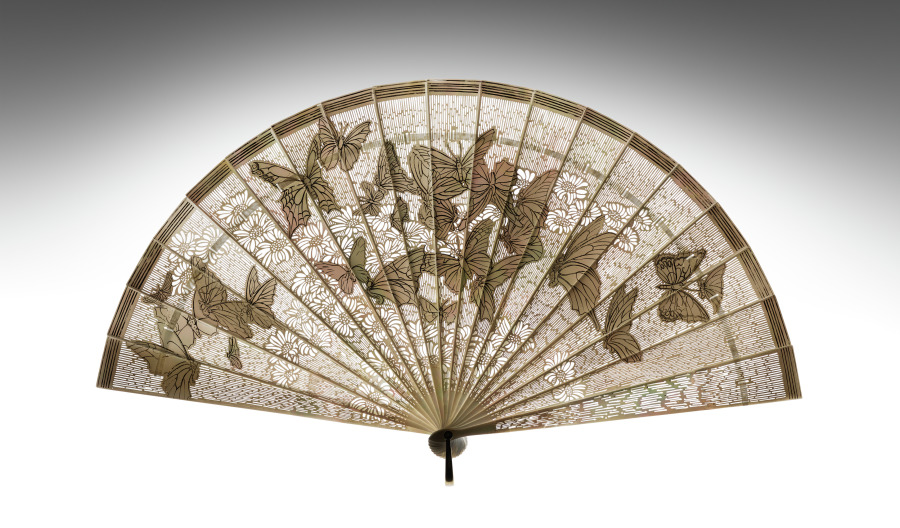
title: Fan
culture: France, 20th century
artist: René Lalique (French, 1860–1945)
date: c. 1900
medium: mother-of-pearl, gold, silk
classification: Jewelry